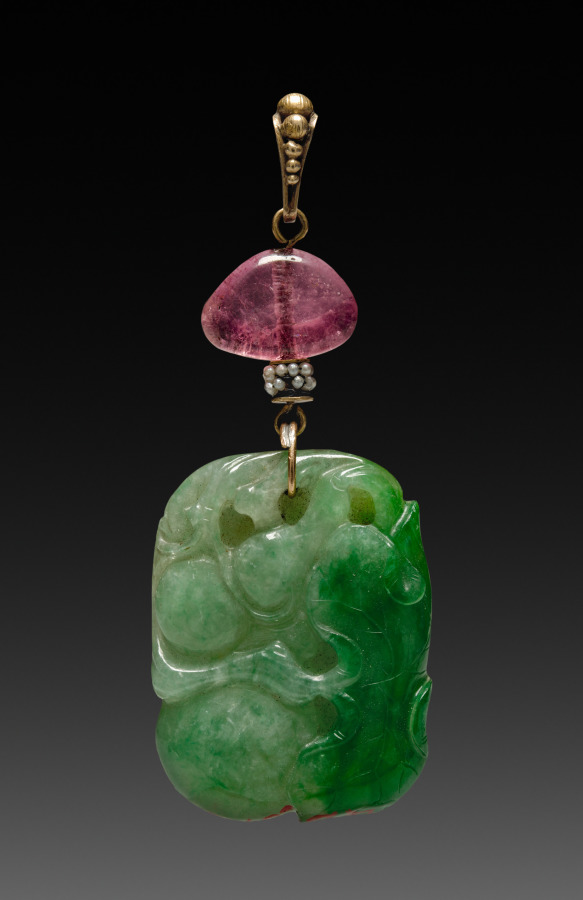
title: Pendant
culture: China, Qing dynasty (1644-1911)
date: 1644–1911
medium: gold, carved green jade, rose quartz, and seed pearls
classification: Jewelry